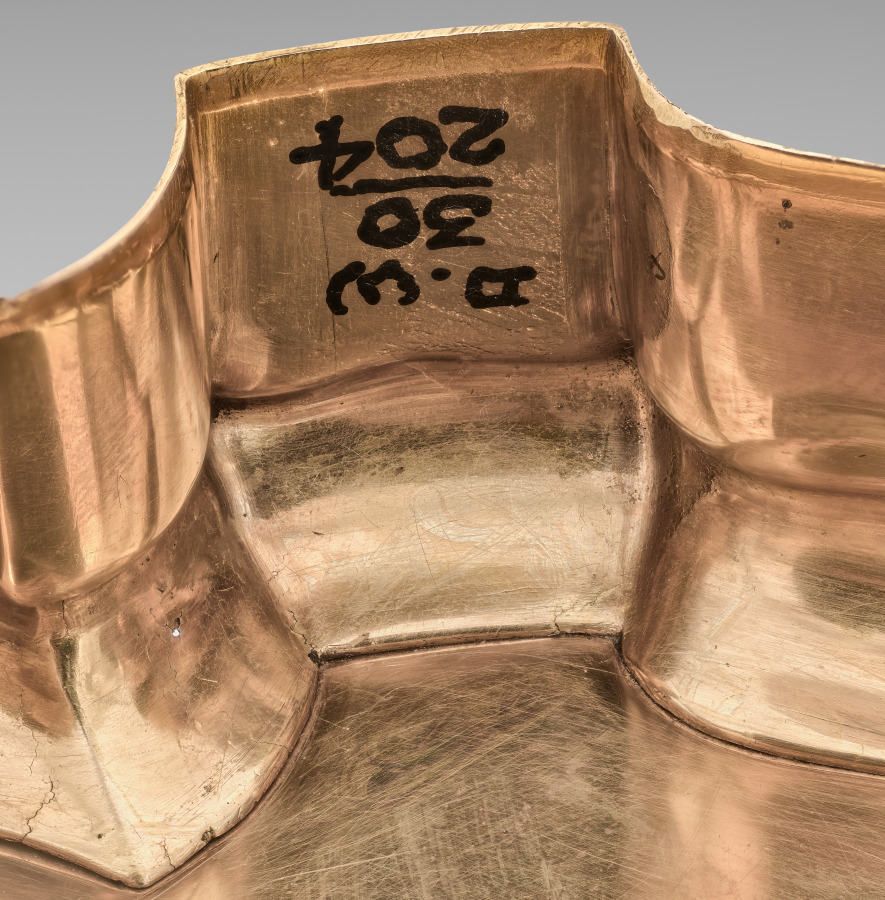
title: Gold Box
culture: France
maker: Juste-Aurèle Meissonnier (French, 1695–1750)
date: 1728–29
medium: gold and lapis lazuli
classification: Metalwork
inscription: IOM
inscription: a crowned M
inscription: a crowned dolphin's head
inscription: a crowned chancellor's mace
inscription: double frame eagle's head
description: With its central cartouche, heavy molding, and fluted sides, the design of this box attests to Juste-Aurèle Meissonnier’s interest in architecture. The box is further distinguished by a strong sense of movement, achieved through its dynamic contour, extraordinary level of detail, and the dramatic contrast between gold and lapis lazuli. Such small boxes, known as snuffboxes, were used to hold scented powdered tobacco that was inhaled through the nostrils. Made of precious materials and highly ornamented, they conveyed the owner’s wealth, fashion awareness, sophistication, and social standing. These personal, collectible items were often presented as luxurious gifts. This box was made for the dowager Queen of Spain, Maria Anna of Neuburg, whose coat of arms – along with that of her late husband, Charles II – features on the cover.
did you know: This is one of the two known objects that bear the maker's mark of Meissonnier.